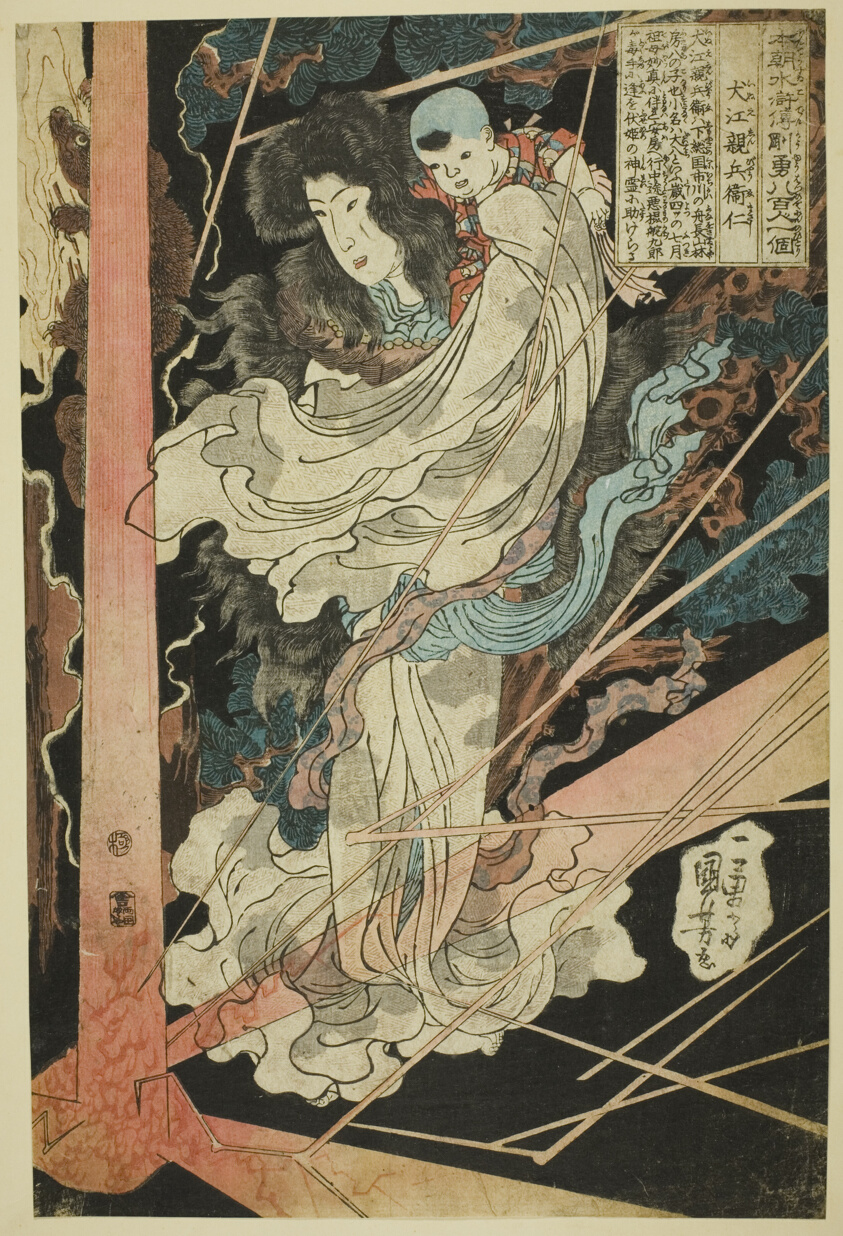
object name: Print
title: Inue Shinbyoe Masashi, from the series "Eight Hundred Heroes of the Japanese Water Margin (Honcho Suikoden goyu happyakunin no hitori)"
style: Japanese (culture or style), edo (japanese period), Japanism, East Asian, asian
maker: Utagawa Kuniyoshi (Japanese, 1797-1861)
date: c. 1836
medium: Color woodblock print; oban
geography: Japan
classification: woodblock print; print; asian art